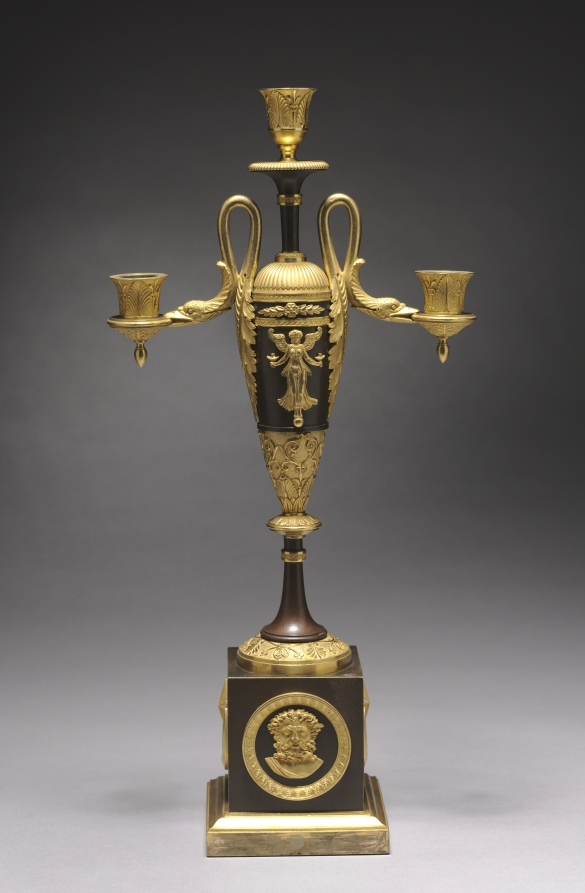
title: Candelabrum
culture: France, late 18th-early 19th century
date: c. 1800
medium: gilt and patinated metal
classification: Furniture and woodwork